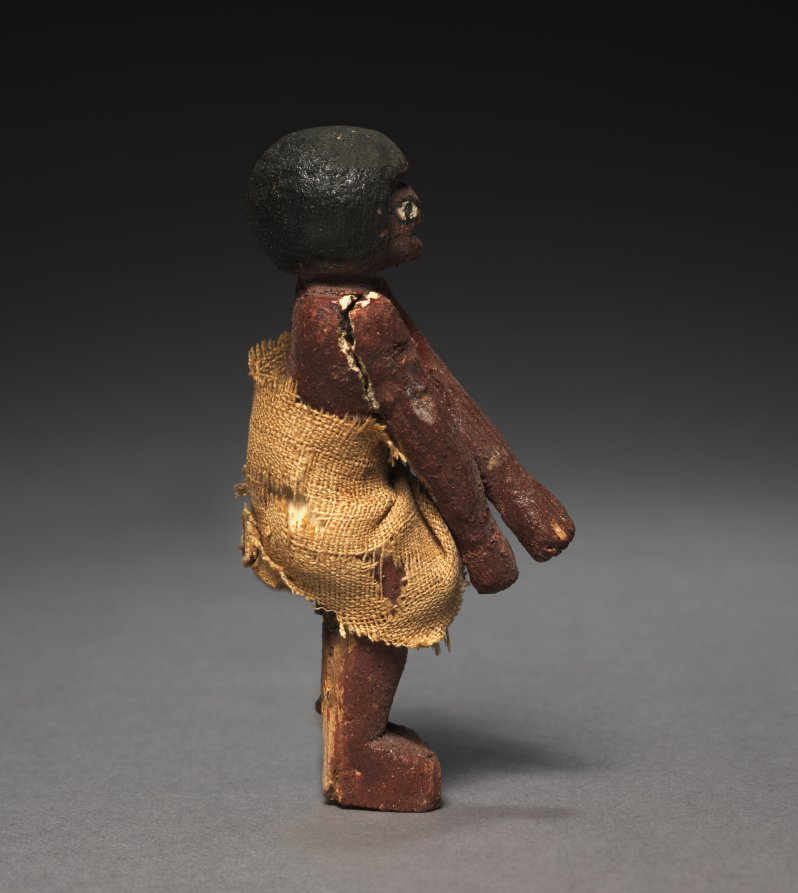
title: Seated Model Sailor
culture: Egypt, Middle Kingdom (2040–1648 BCE), Dynasties 11–12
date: 2000–1000 BCE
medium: painted sycamore fig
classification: Funerary Equipment